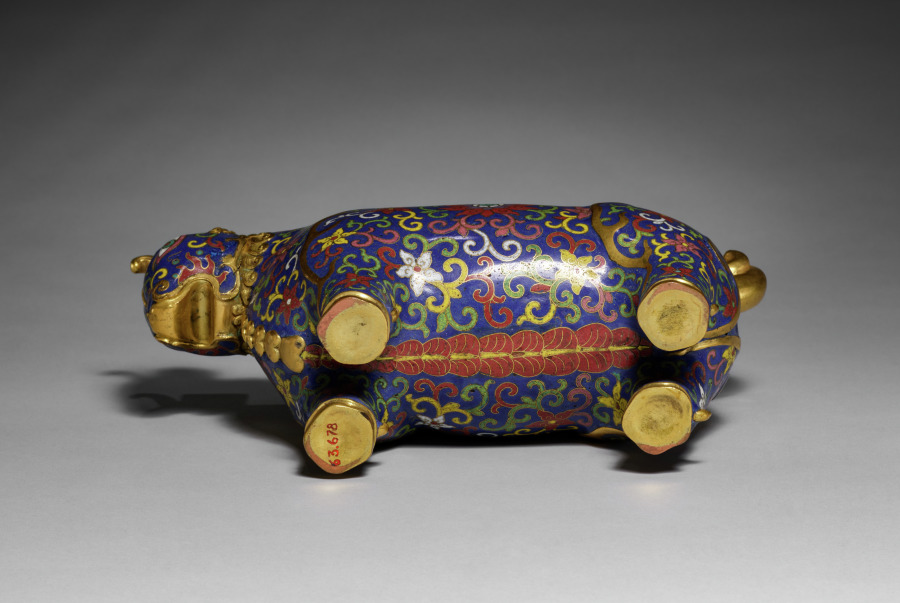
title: Container in the Form of a Unicorn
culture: China, Qing dynasty (1644-1911), Qianlong mark and reign (1736-95)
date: 1736–95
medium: cloisonné enamel and gilt copper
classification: Enamel